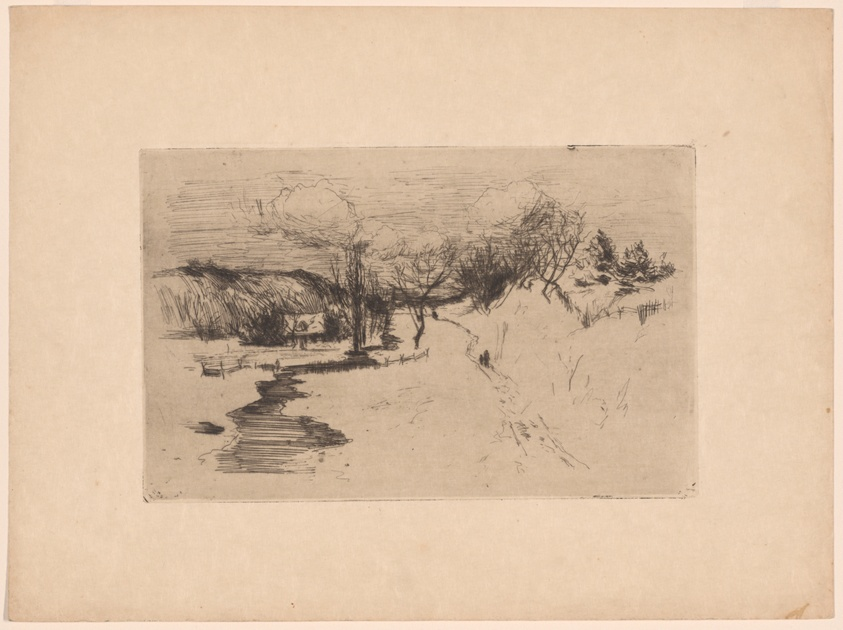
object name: Print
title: Snow Landscape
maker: John Henry Twachtman (American, 1853-1902)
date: 1879–83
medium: Etching and drypoint in black cream wove paper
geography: United States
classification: prints and drawing; paper; print; etching